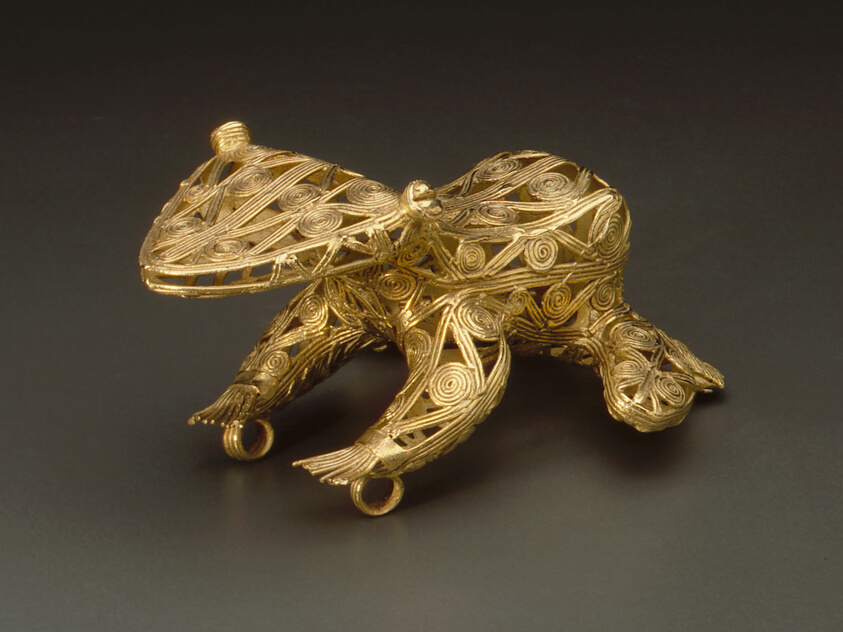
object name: Costume and Accessories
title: Filagree Pendant in the Form of a Frog or Toad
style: coclé, Pre-Columbian, americas, venado beach, lower central america, Arts of the Americas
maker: Coclé (Venado Beach, Coclé province, Panama)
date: 500–1000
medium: Cast gold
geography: Venado Beach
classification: jewelry; pendant (jewelry); metal; art of the americas; costume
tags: frog, animals